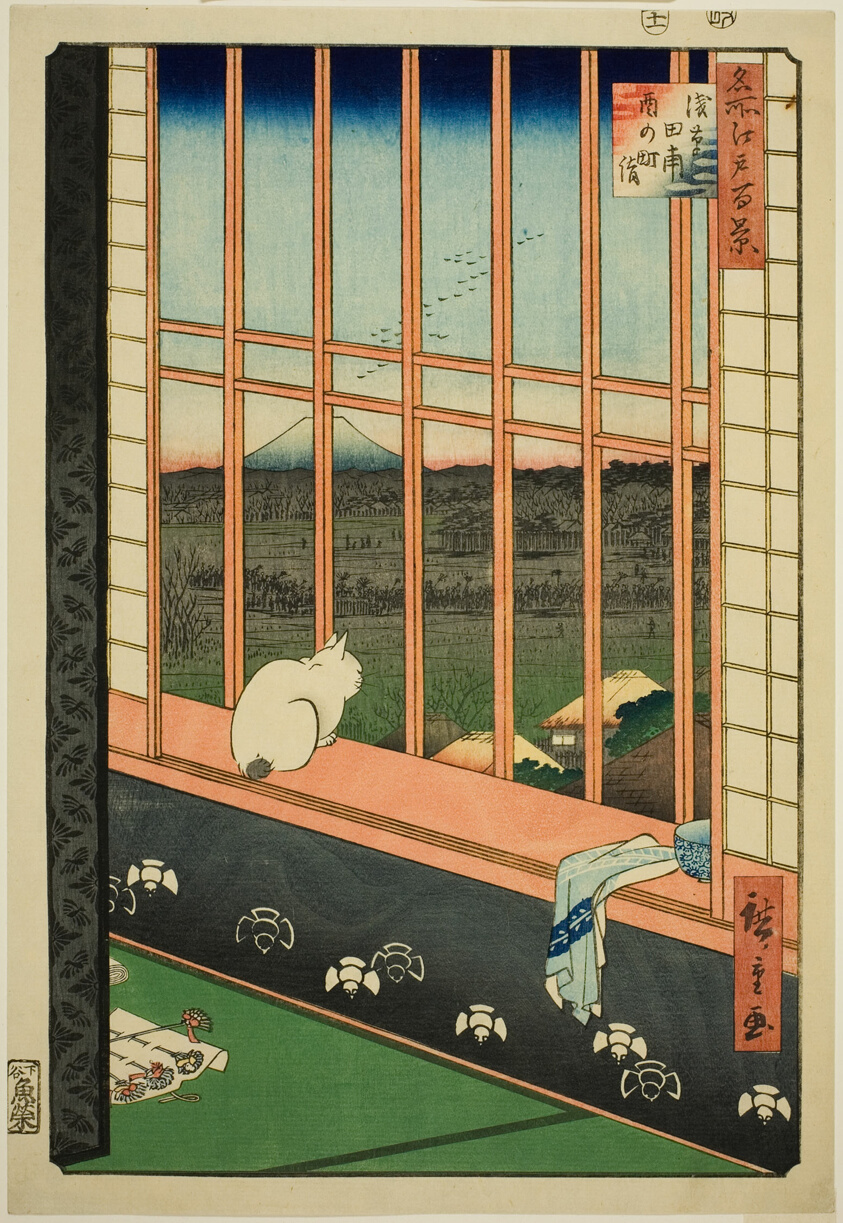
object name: Print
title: Asakusa Rice Fields and Torinomachi Festival (Asakusa tanbo Torinomachi mode), from the series "One Hundred Famous Views of Edo (Meisho Edo hyakkei)"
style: Japanese (culture or style)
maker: Utagawa Hiroshige 歌川 広重; Japanese, 1797-1858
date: 1857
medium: Color woodblock print; oban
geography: Japan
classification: woodblock print; print; asian art